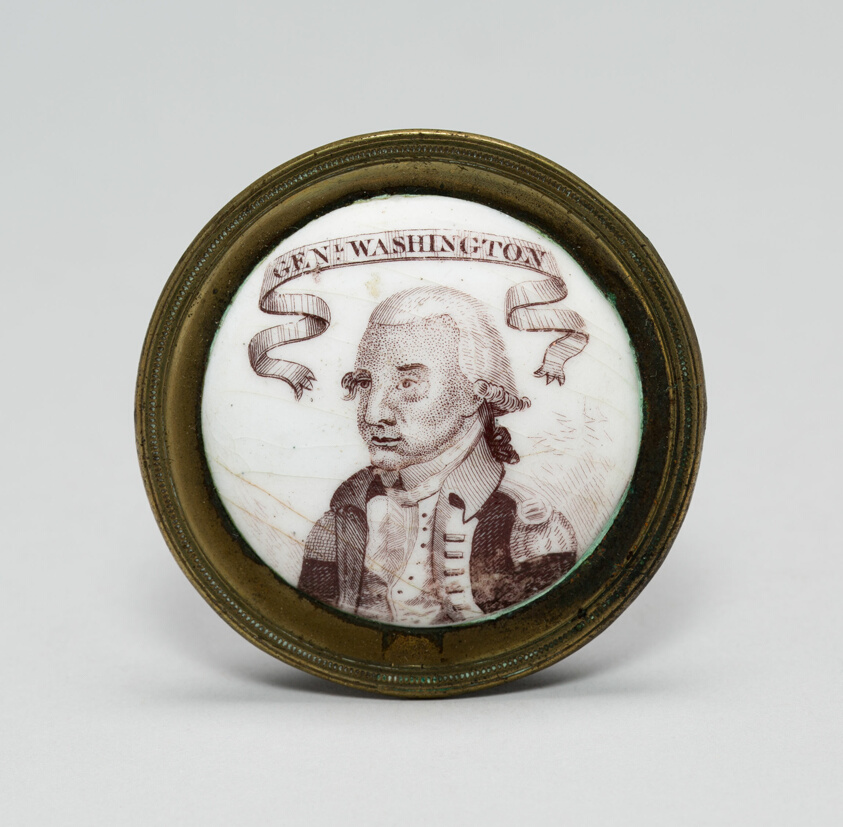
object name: Metalwork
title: Cloak Pin (Knob or Tieback)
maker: Probably Birmingham, England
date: c. 1780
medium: Copper, transfer printed enamel, iron and brass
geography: England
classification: costume accessory worn above the waist; metalwork; pin (jewelry); european decorative arts